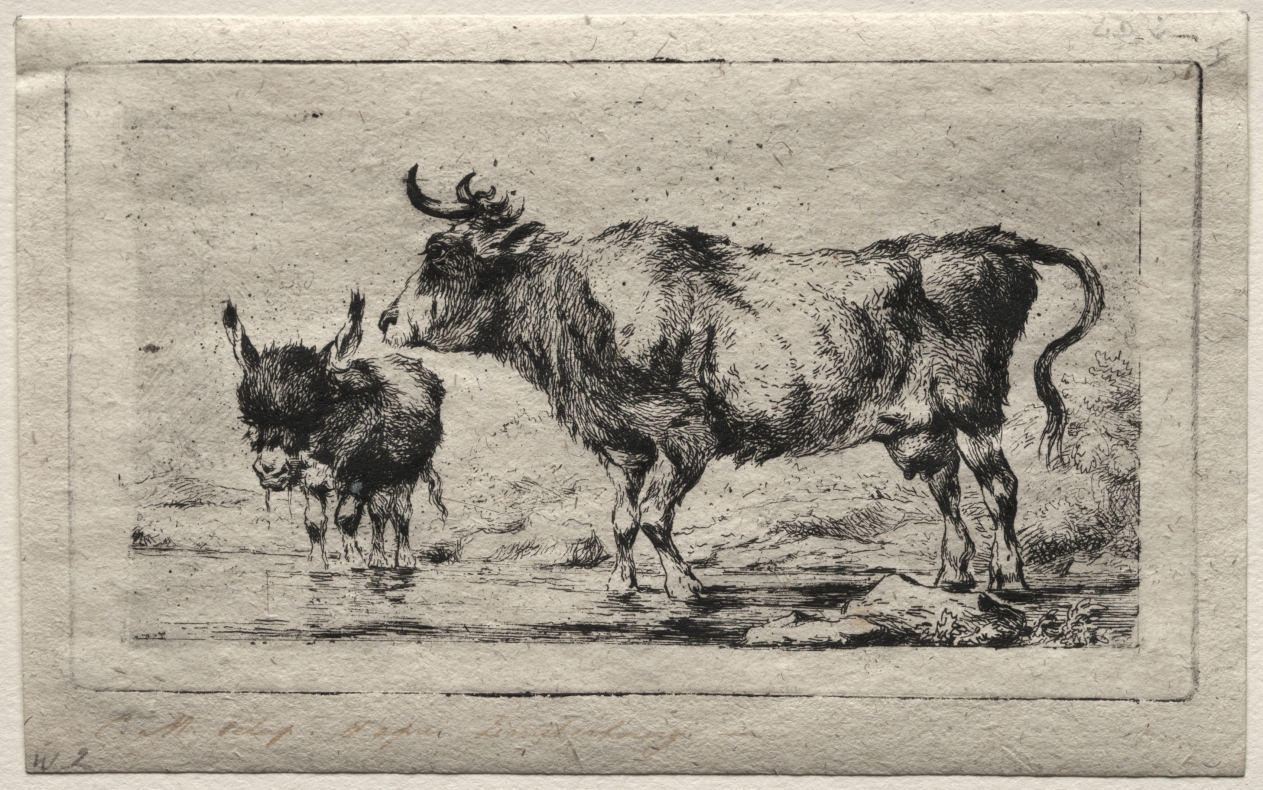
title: Cow and Ass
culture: France, 19th century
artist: Charles Meryon (French, 1821–1868)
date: 1849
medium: etching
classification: Print